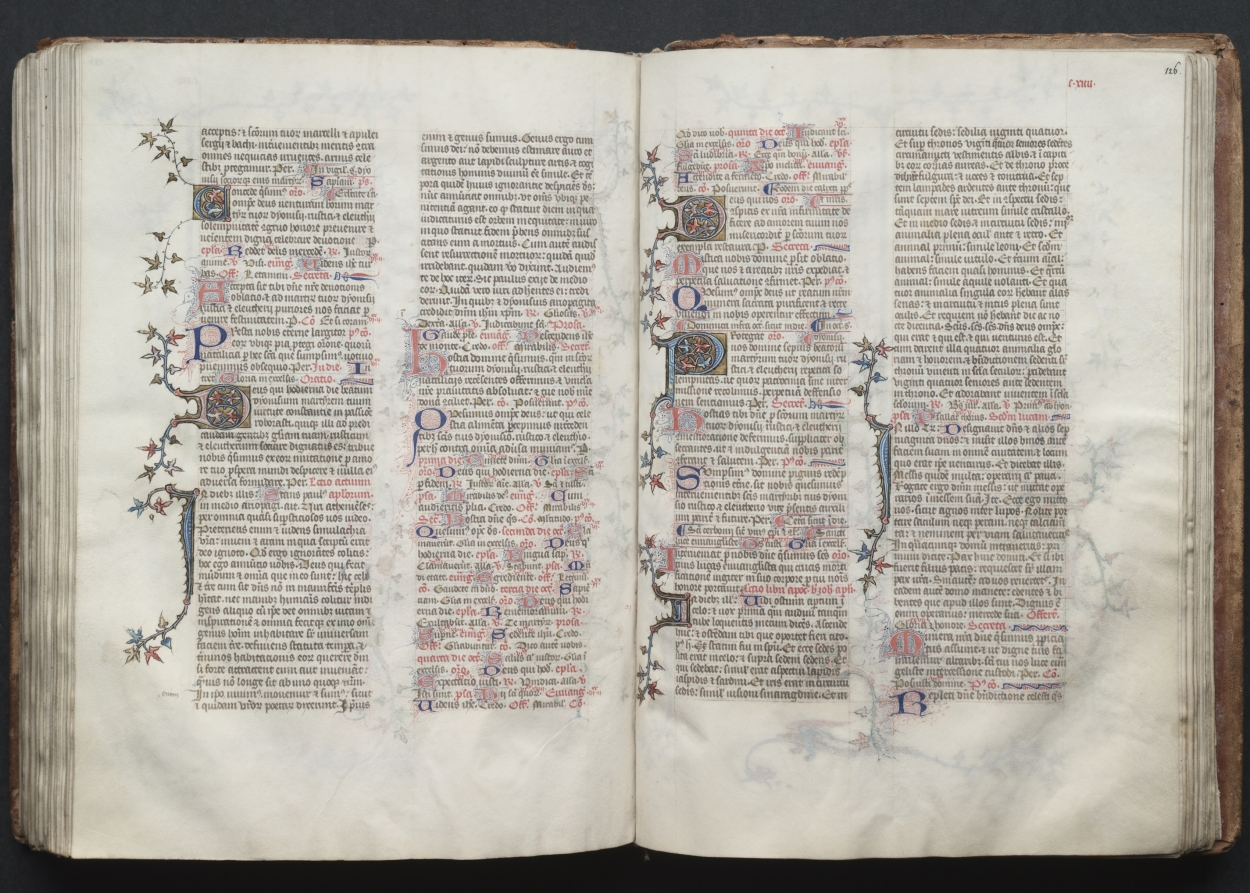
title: The Gotha Missal: Fol. 126r, Text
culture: France, Paris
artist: Master of the Boqueteaux (French)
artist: and Workshop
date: c. 1375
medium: ink, tempera, and gold on vellum; blind-tooled leather binding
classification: Bound Volume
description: The style and quality of this manuscript's decoration is typical of deluxe Parisian books made for aristocratic or royal patrons. Most of the book's decoration appears to be the work of the Master of the Boqueteaux, an artist active at the court of King Charles V (died 1380). His style was apparently shared by a number of book illuminators working in and around Paris. It is very possible that the Gotha Missal belonged to Charles V, but is not provable because the manuscript has no royal portraits and lacks a colophon. Given the book's magnificent decoration, however, it would seem that it was produced for a Valois prince, if not for the king himself. The manuscript receives its name from the German dukes of Gotha, its later owners.